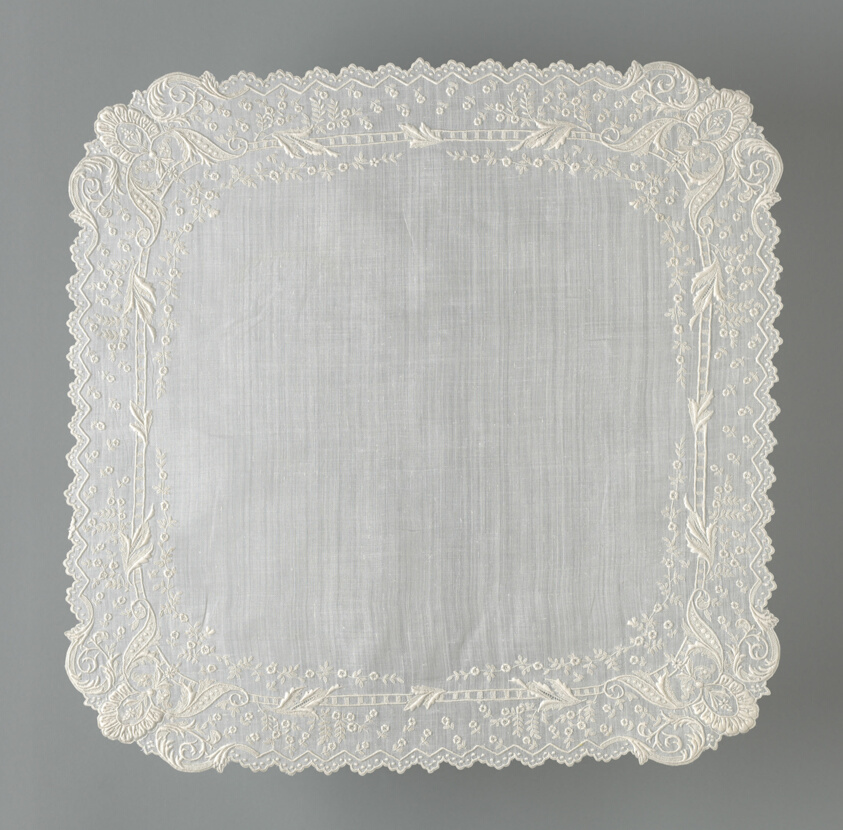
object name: Textile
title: Handkerchief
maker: France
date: 19th century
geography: France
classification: textile; needlework (visual works); accessories (object genre); weaving